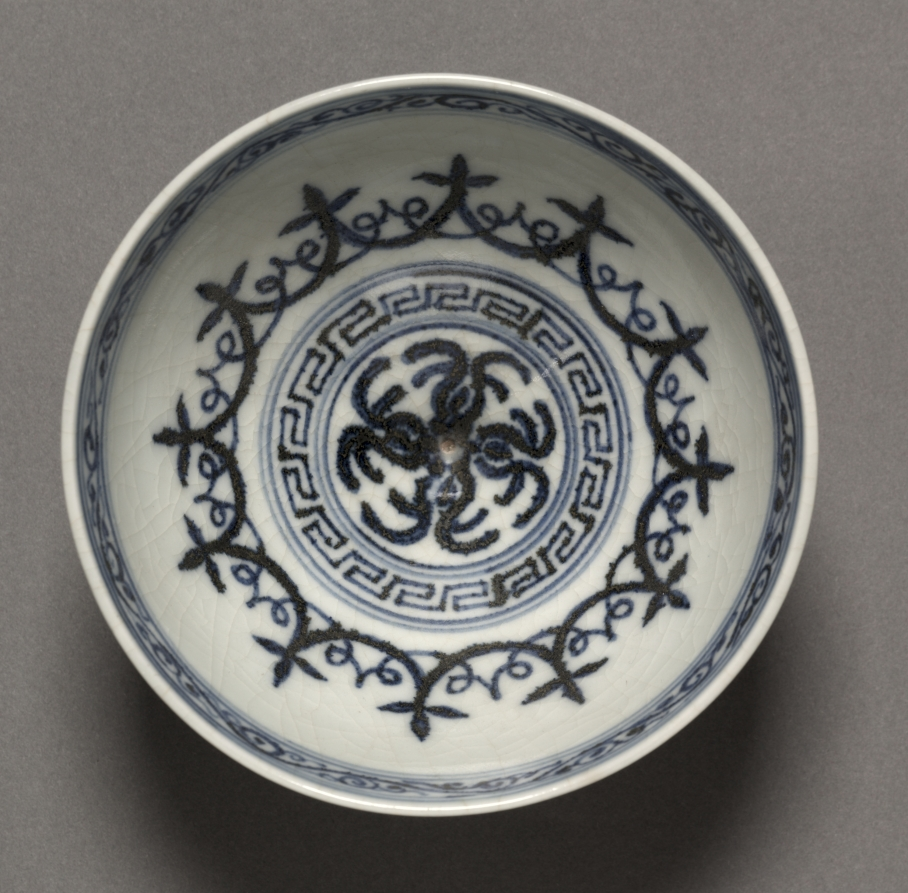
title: Lotus-Seed Bowl with Petals and Arabesques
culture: China, Jiangxi province, Jingdezhen, Ming dynasty (1368-1644), Yongle period (1403-1424)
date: 1403–24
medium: porcelain with underglaze blue decoration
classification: Ceramic